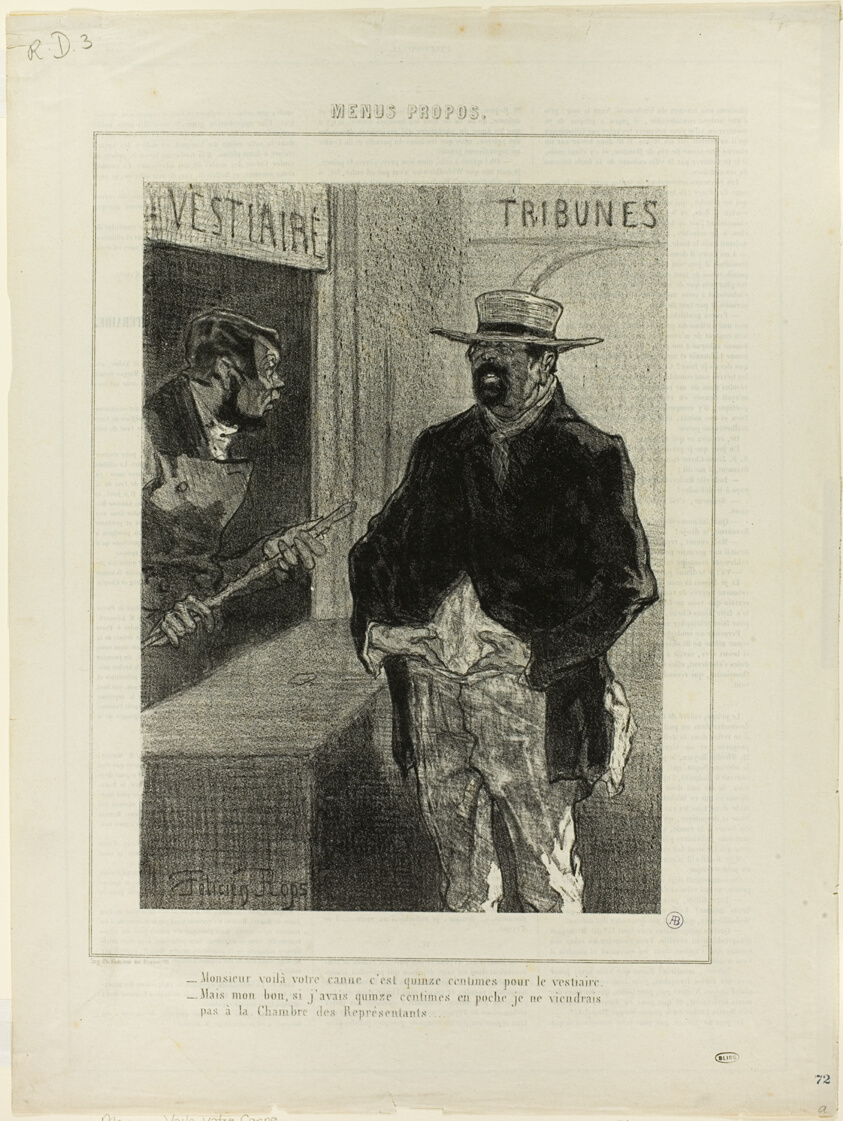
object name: Print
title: Menus propos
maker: Félicien Rops (Belgian, 1833-1898)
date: published May 24, 1857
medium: Lithograph (with letterpress on verso) on ivory wove paper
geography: Belgium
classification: lithograph; print; prints and drawing